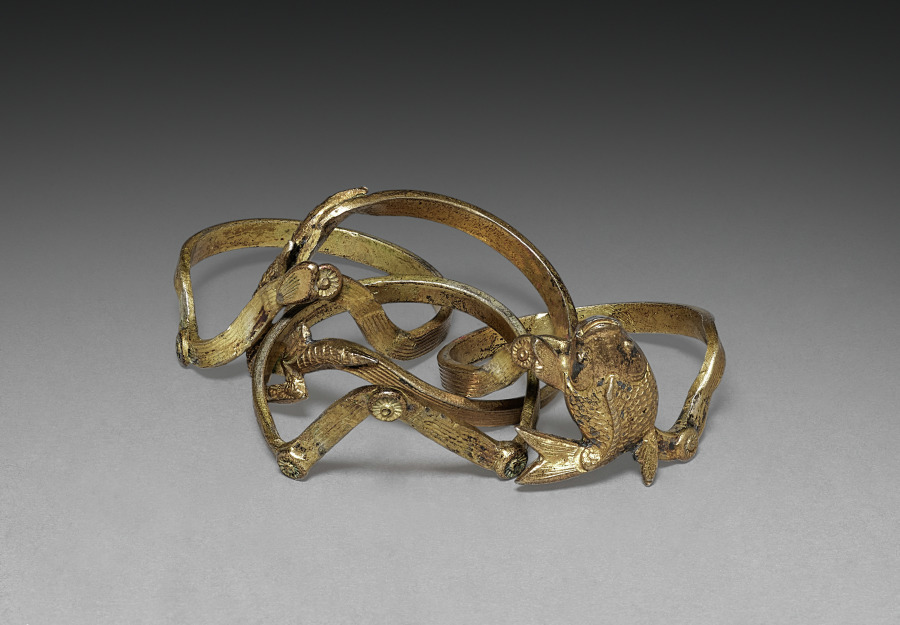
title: Ring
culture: Japan, Meiji period (1868–1912)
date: c. 1868–1912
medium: metal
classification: Jewelry